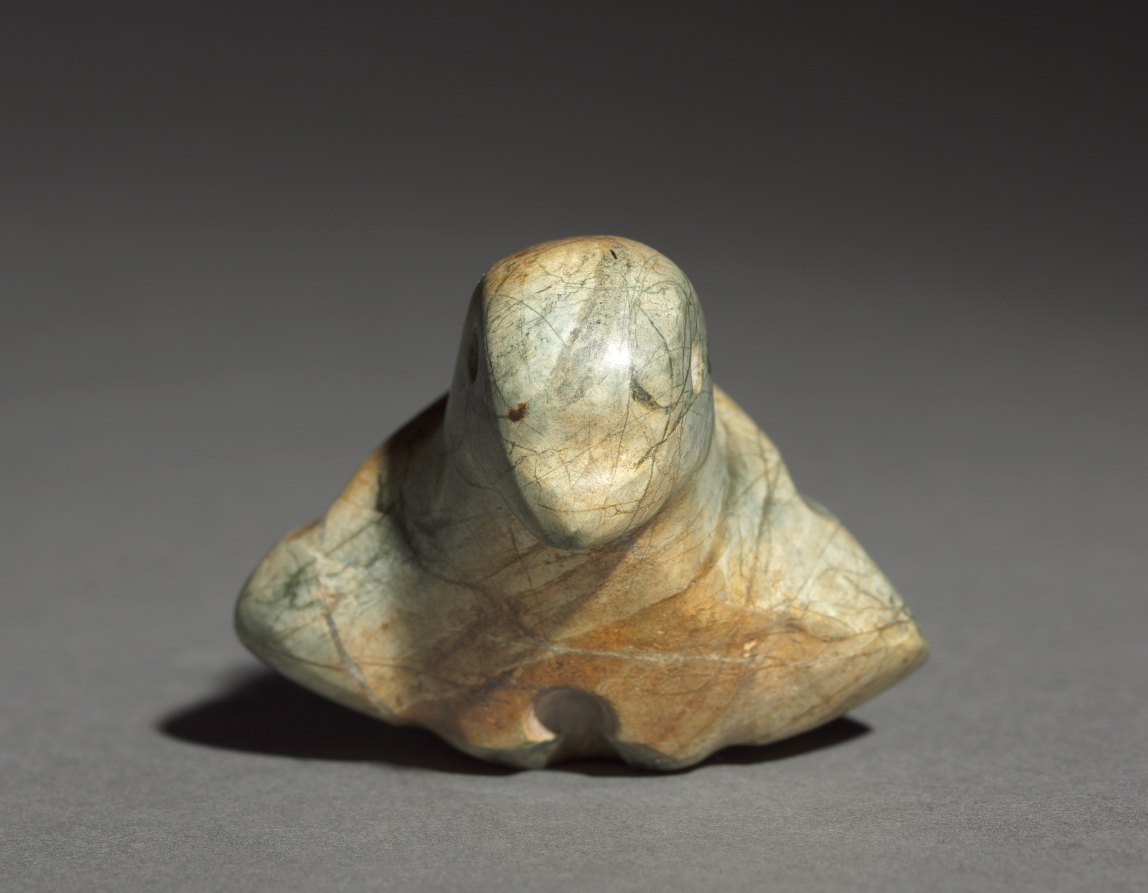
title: Bird Pendant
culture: Mesoamerica, Mexico, Guerrero, Mezcala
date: 100 BCE–300 CE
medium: polished gray-brown stone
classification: Sculpture